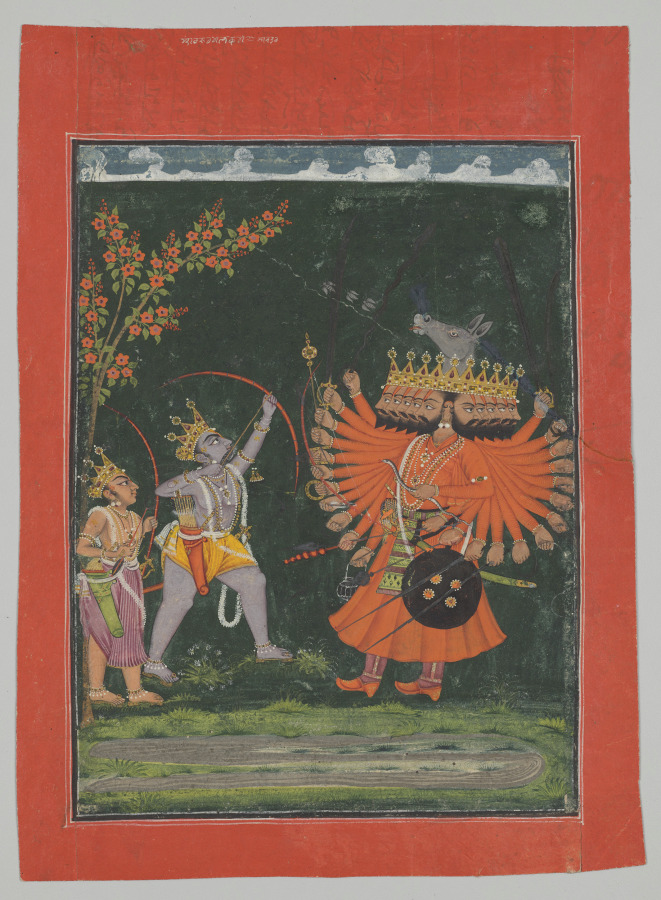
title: Rama and Lakshmana Fighting Ravana, from a Dashavatara (Ten Incarnations [of Vishnu]) series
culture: Northern India, Pahari Region, Himachal Pradesh, Rajput Kingdom of Chamba, Court of Raj Singh (reigned 1764–94)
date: c. 1765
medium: Gum tempera and gold on paper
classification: Painting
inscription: [[top border, in Takri]] sri raja ram lachhamana avatara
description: Against the dark green and foreboding landscape, the final and much-anticipated battle between the demon king Ravana and the mighty princes Rama and Lakshmana unfolds. Ravana wields twenty weapons, including a poisonous snake in his front left hand. The blue Rama aims an enchanted crescent-shaped arrow at bees emitted from the donkey head at the apex of Ravana’s ten crowns. The arrow and bees stand for powerful mantras, or magical incantations, that can destroy one’s enemies. The impending defeat of Ravana will fulfill the purpose of Vishnu’s incarnation as Rama.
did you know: Rama and Lakshmana wield divine bows in their fight against the ten-headed demon Ravana.